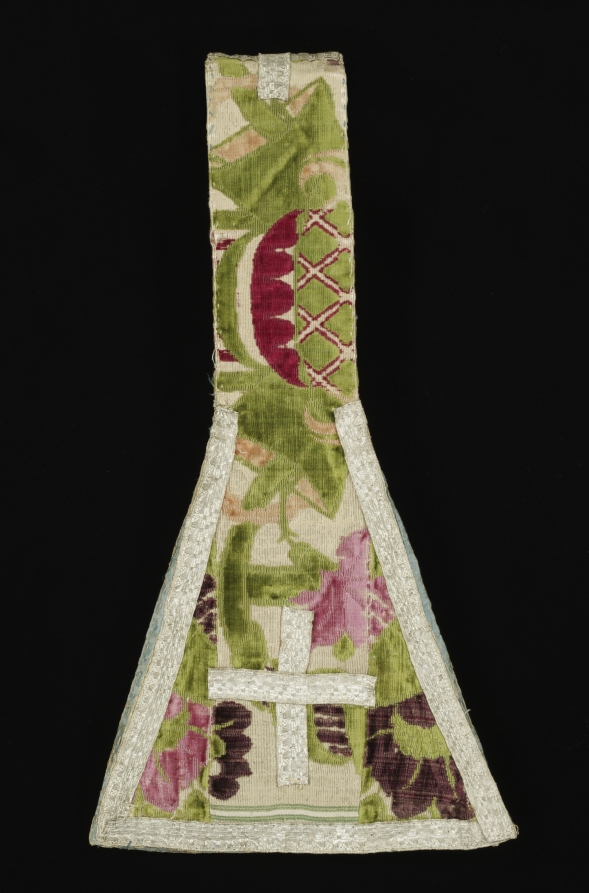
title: Maniple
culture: Italy, Genoa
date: 17th century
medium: cut and uncut silk velvet, metal thread lace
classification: Velvet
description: This sumptuous polychrome velvet displays a central vase with abundant flora and exotic leaves flanking curving blossoming fronds on a gilt-metal thread ground. The pattern was created with five colors of cut and uncut (loops) velvet pile. Only the pile warps for the lush green velvet occur across the entire cloth, while each additional color appears in vertical stripes—crimson, peach, rose, and purple. These widely acclaimed velvets from Genoa were the most colorful woven in Europe. Both the long stole and the shorter maniple are insignia of the office of deacons, priests, and the higher clergy. The stole was worn under a chasuble according to the office and the maniple was hung on the left forearm. The burse is a stiff receptacle in which the folded corporal, a white linen cloth on which the sacred bread and chalice are placed during the Mass, is carried to and from the altar. The upper fabric matches the chasuble, the bottom is a plain silk, and the interior has an obligatory linen lining.